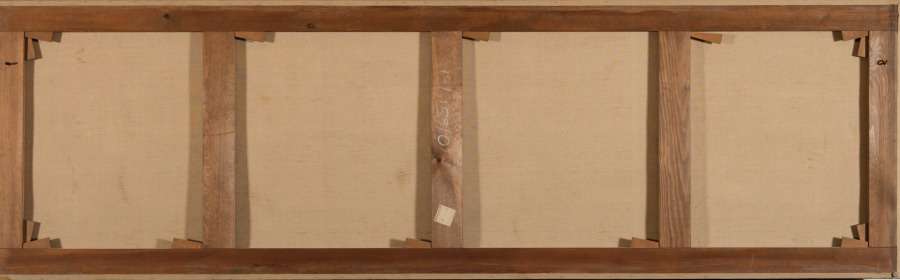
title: Raja Sansar Chand attacking Kangra Fort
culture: Northern India, Pahari kingdom of Kangra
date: after 1782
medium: Gum tempera, ink, and gold on cotton cloth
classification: Painting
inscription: Inscriptions in Takri and Persian. Persian reads: “On the 23rd of the month of Kartik, Samvat 1839 (1782 AD) Sri Maharaja Sansar Chand Bahadur attached Lakkarkot (Nagrakot ?) and the fortress of Kangra, attained victory and made siege intrenchments at the fortress of Kot Kangra.”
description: In 1782, the 17-year-old king of Kangra fought to retake his ancestral kingdom from the Mughals, who had controlled the territory since 1620. He rides a dark brown horse in front of the camel at the far right, blending in among his army and allies. The leftmost panel shows the residents of Kangra fleeing the conflict with their belongings on their heads to the safety of the fortress at the far left, from the walls where cannons are being fired. The main temple, built of gray stone, is in the middle of the composition, marked by red flags.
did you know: The king is 17 years old, beardless, riding a dark brown steed in front of the camel at the far right.